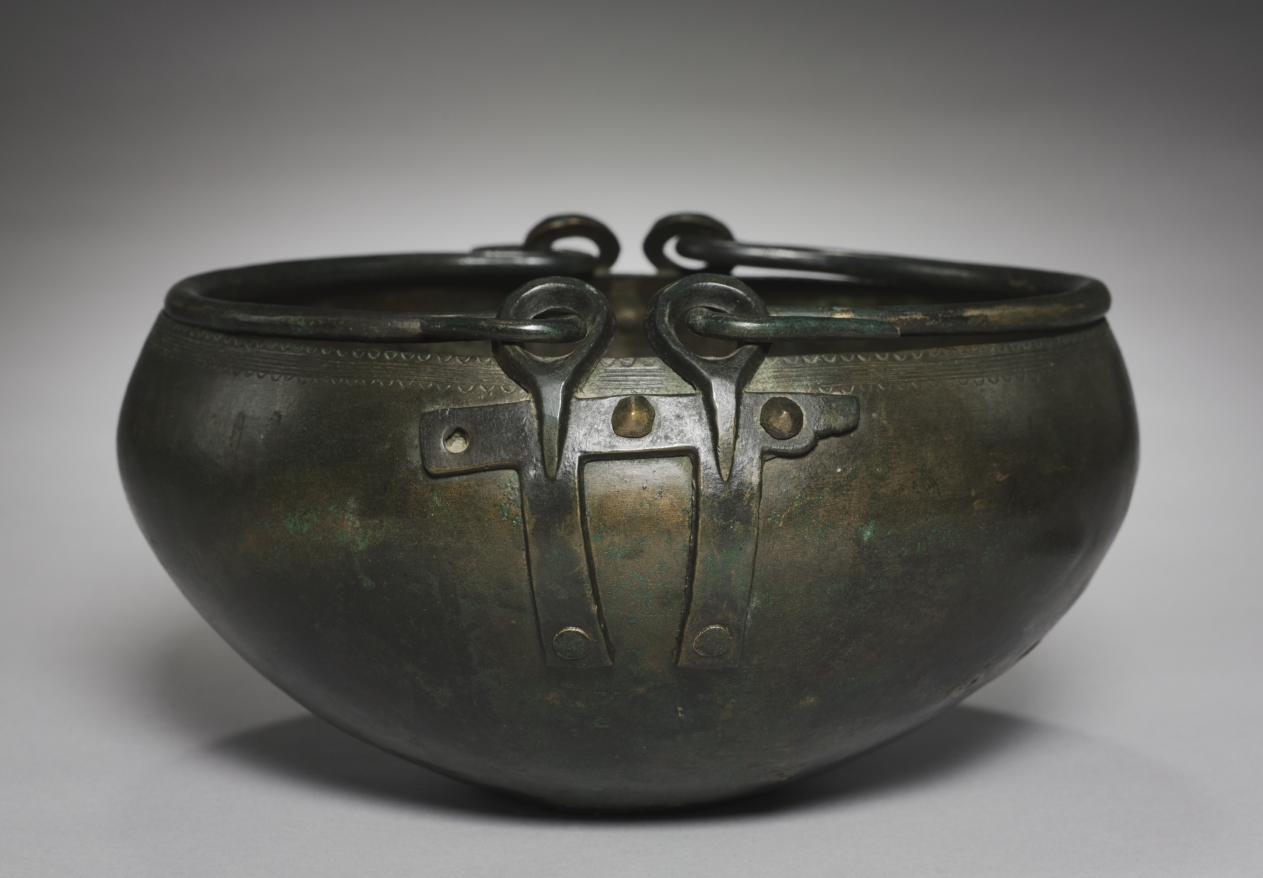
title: Ritual Cauldron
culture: Hungary, Bronze Age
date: c. 1000–900 BCE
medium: bronze, hammered, cast and wrought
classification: Metalwork